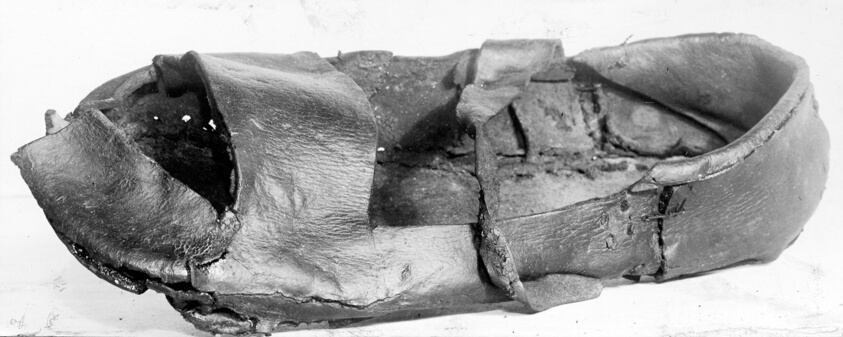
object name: Textile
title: Shoe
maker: England, London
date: 16th century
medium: Leather, slashed toe and strap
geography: England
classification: textile; shoes - misc; costume accessory - shoe; costume; dress (garment); clothing